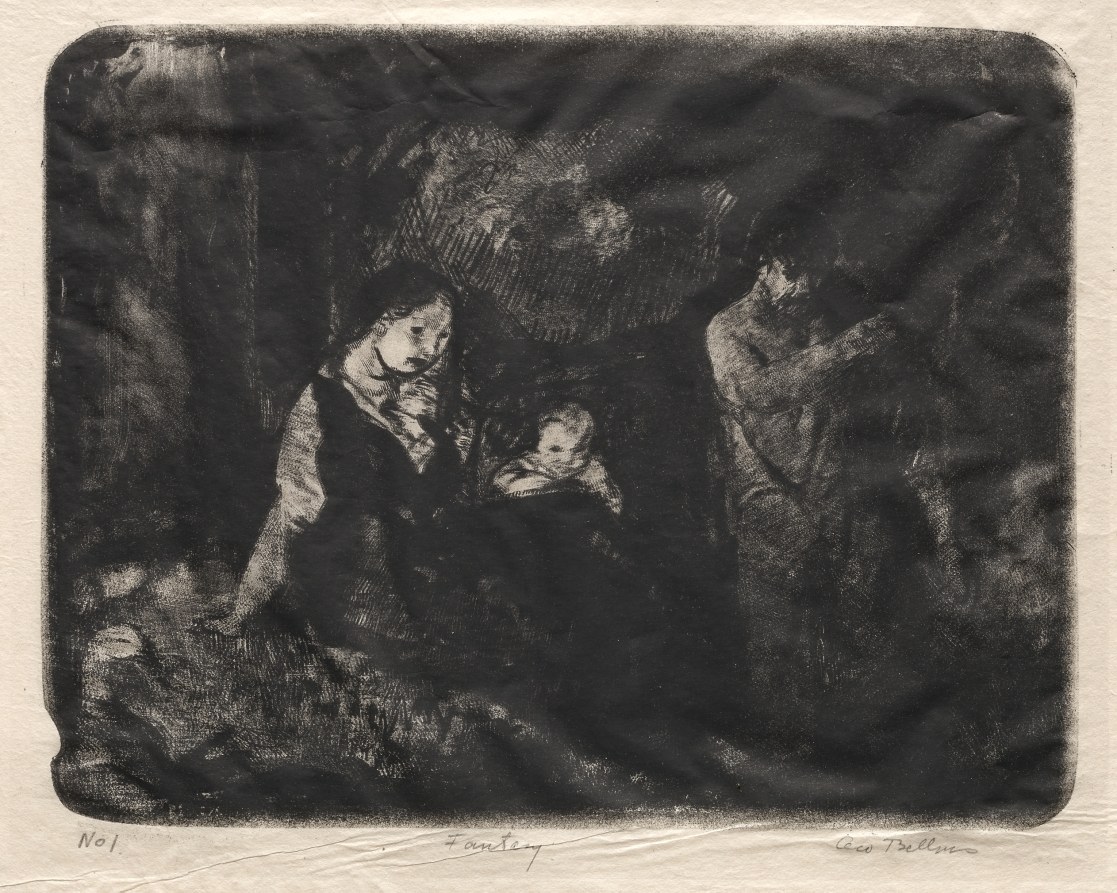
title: Fantasy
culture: America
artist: George Bellows (American, 1882–1925)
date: 1916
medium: lithograph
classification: Print